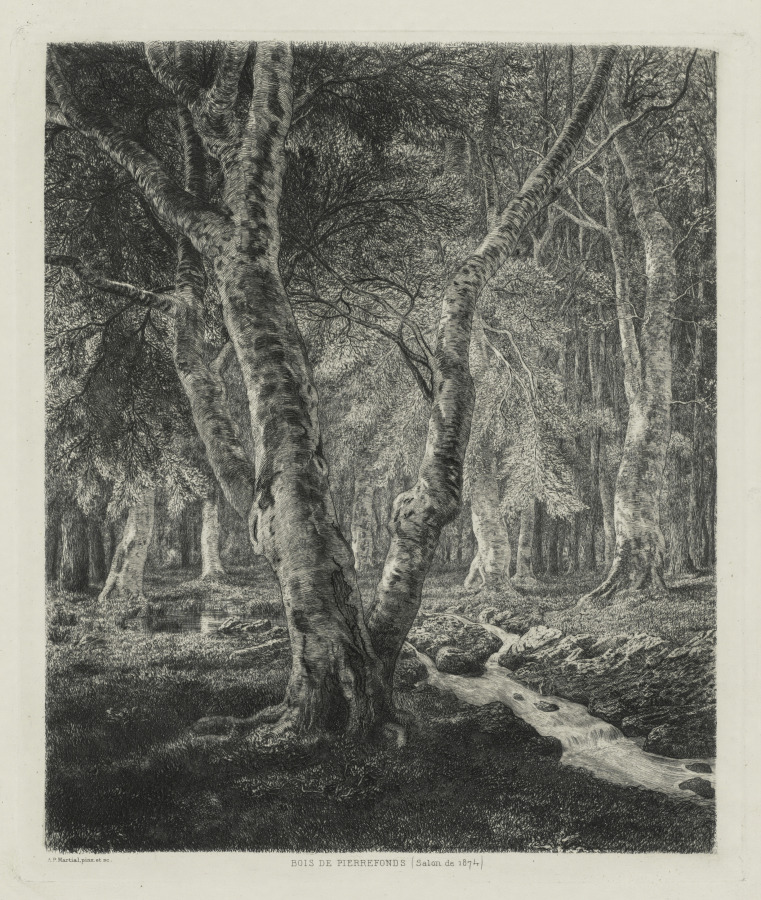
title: Bois de Pierrefonds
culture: France, 19th century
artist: Adolphe Théodore Jules Martial Potémont (French, 1828–1883)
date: 1874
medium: etching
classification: Print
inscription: On plate, below image, lower left: A.P. Martial. Pinx et sc, center: Bois de Pierrefonds (Salon de 1874)